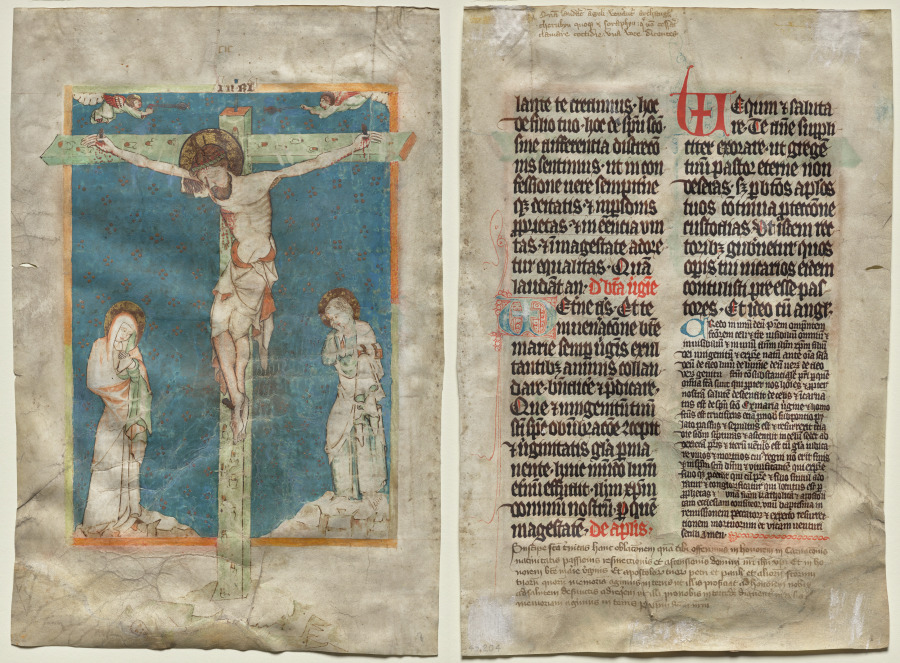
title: Leaf from a Missal: The Crucifixion (recto) and Text (verso)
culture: Bohemia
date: c. 1330–40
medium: ink, tempera, and gold leaf on parchment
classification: Manuscript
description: The crucified Christ was a central theme of medieval visual art. Each period set its own artistic and iconographic priorities, depending on the function and context of the works. For example, the dead Christ with his head bowed, the side wound dripping with blood, and the richly designed loincloth is characteristic of the 1300s. This miniature is from Bohemia (present-day Czech Republic and Slovakia), with its capital, Prague, as a leading art center of its time. The great plague, however, does not seem to have triggered a surge of innovation there.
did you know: Below the cross a small skull is visible. Golgotha, the site of the Crucifixion, was often translated as "place of the skull."